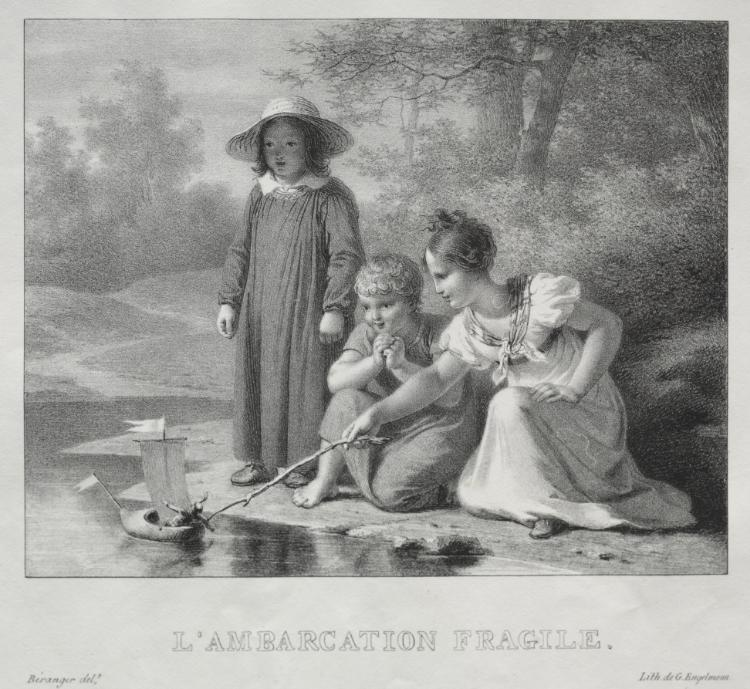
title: L'Ambarcation fragile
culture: France, 19th century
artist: Antoine Béranger (French, 1785–1867)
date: 1800s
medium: lithograph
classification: Print